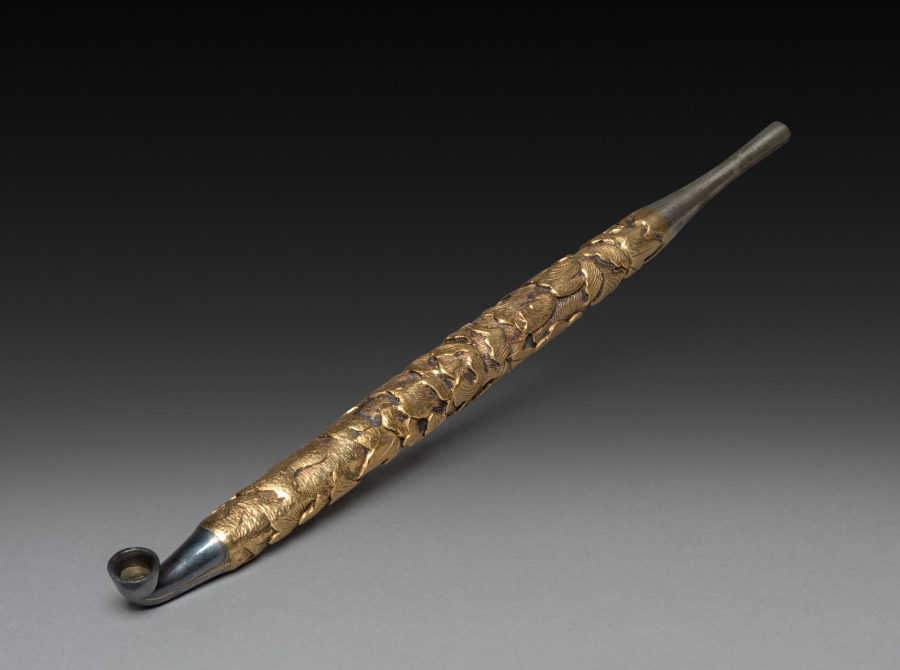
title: Tobacco Pipe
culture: Japan, Edo period (1615–1868) to Meiji period (1868–1912)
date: 1800s-early 1900s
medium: silver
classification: Miscellaneous